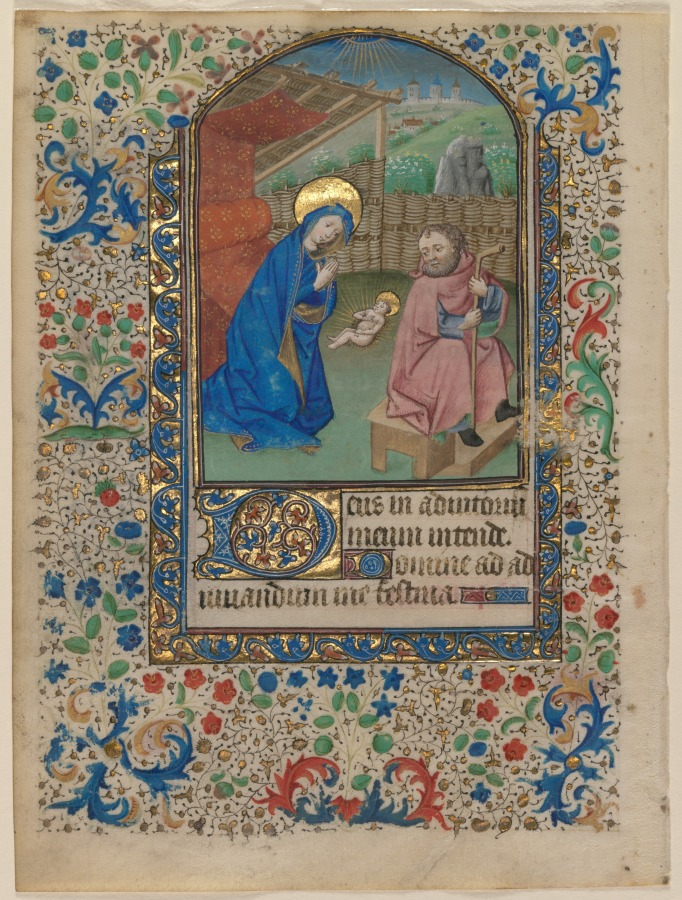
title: Leaf from a Book of Hours: The Nativity (recto) and Text (verso)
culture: Northeastern France, 15th century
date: c. 1430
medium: ink, tempera, and gold on vellum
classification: Manuscript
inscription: Deus in adiutorium meum intende. Domine, ad adiuvandum me festina.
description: Representing God's entry into the world, the Nativity remains one of medieval painting's most poignant Christian images. In the Gospels, only Matthew and Luke directly described this event. Perhaps the brevity and absence of detail in these texts allowed artists to devote so much creativity to amplifying the Christmas story. This miniature's simplicity makes it compelling. Only the three principals—Mary, Joseph, and the newly born Christ child—appear in the scene. The Virgin kneels before an elegant canopied bed made sumptuous by a richly embroidered textile, which stands in contrast to the nearby rustic fence and receding landscape. This scene probably follows the mystical visions of Saint Bridget of Sweden who visited Bethlehem in 1370, and whose written accounts circulated widely after her canonization in 1391: "When her time came she took off her shoes and her white cloak and undid her veil. . . . Then she made ready the swaddling clothes which she put down beside her. When all was ready she bent her knees and began to pray. While she was thus praying with hands raised the child was suddenly born, surrounded by a light so bright that it completely eclipsed Joseph's feeble candle."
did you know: Books of hours were devotional books popular in the Middle Age, meant for laypeople, or those not in the clergy. They were used at home and contained daily prayers as well as prayers for specific occasions, such as death, plague, warfare, travel, or bad weather.